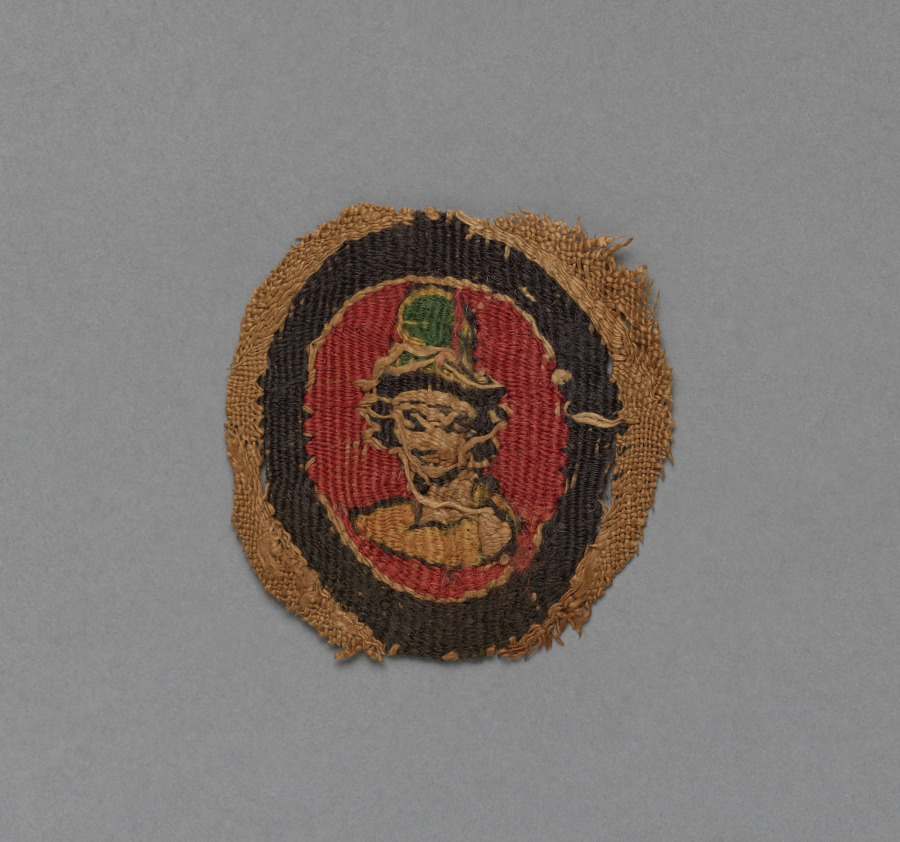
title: Fragment from a Tunic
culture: Egypt, 6th - 16th century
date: 500s - 1500s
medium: tabby weave with inwoven tapestry ornament, linen and wool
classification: Textile